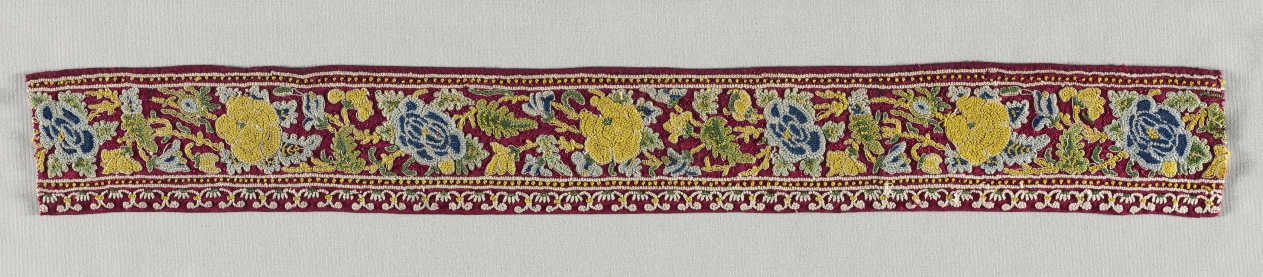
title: Fragment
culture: China, 20th century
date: first half 1900s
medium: embroidery, silk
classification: Embroidery